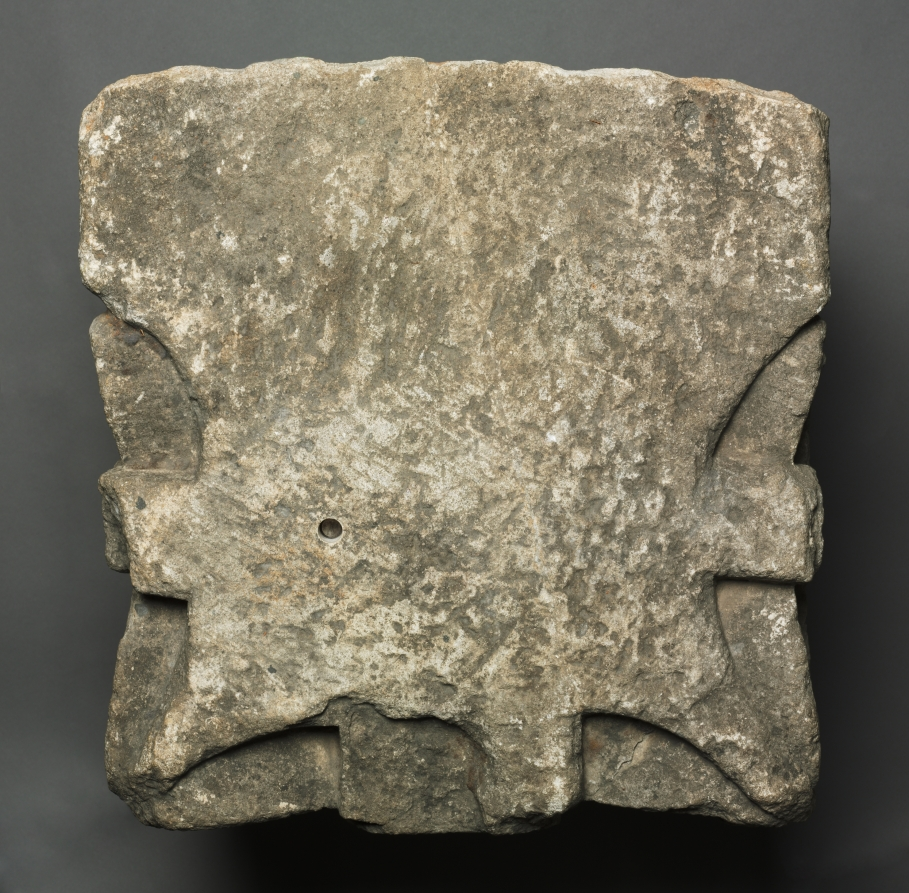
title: Engaged Capital with a Fantastic Creature and Three Birds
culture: Western France, Bordelais, early 12th century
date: early 1100s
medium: limestone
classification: Sculpture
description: The closest parallels for the dramatic, heavy style of this capital appear in the capitals of the porch of Saint-Seurin in Bordeaux.